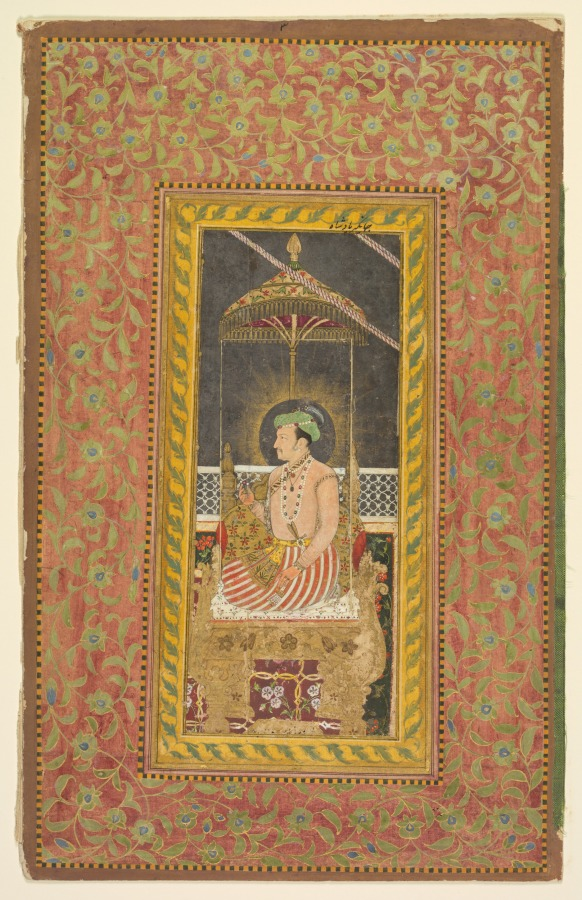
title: Posthumous portrait of Emperor Jahangir under a canopy (recto)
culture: India, Mughal, 17th century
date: c. 1650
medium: Gum tempera, ink, and gold on paper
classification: Painting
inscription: recto: inscription of identification in upper border, partially erased inscription at lower edge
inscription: Persian inscription above, in inner border, in nasta‘liq script: Great King Jahangir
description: Jahangir, the fourth Mughal emperor, was remembered for his greatness long after his death. Ruling from 1605 to 1627, he laid the foundations for long-term trade and diplomatic relations with various nations of Europe, most notably England and Portugal. He oversaw the transition of Mughal India into a global power during a time that can be considered the international Age of Exploration. This posthumous portrait depicts Jahangir amid the trappings of wealth and power with the light of divine sanction shining behind his head. A white marble railing demarcates his imperial space.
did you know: Jahangir holds a ruby or spinel, thought to be a talisman for military victory.